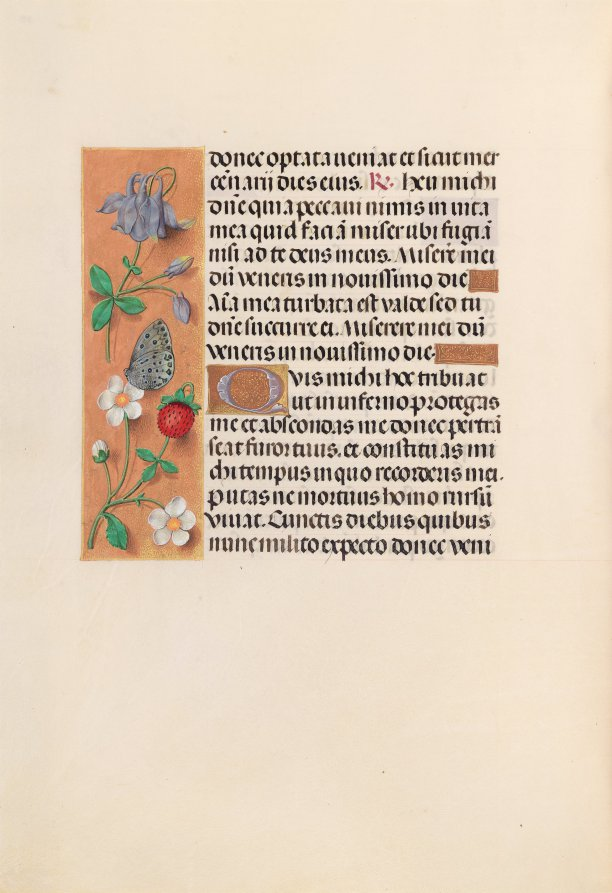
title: Hours of Queen Isabella the Catholic, Queen of Spain: Fol. 238v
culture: Flanders, Ghent and Bruges, late 15th century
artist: Master of the First Prayerbook of Maximillian (Flemish, c. 1444–1519)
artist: and Associates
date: c. 1500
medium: ink, tempera, and gold on vellum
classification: Bound Volume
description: This manuscript was illuminated by a circle of at least five highly organized manuscript painters active in the Flemish cities of Ghent and Bruges. The principal illuminator was Alexander Bening, who painted the majority of the book's miniatures. Manuscripts produced by this circle of artists are renowned for the decoration of their borders, which typically feature a rich variety of realistically-painted flowers, birds, and butterflies. This prayer book, called a book of hours, was intended not for a cleric, but for the private devotions of a lay person-in this case, Isabella the Catholic, Queen of Spain (1451-1504). Isabella's coat of arms embellishes the book's frontispiece. It is unlikely that the book was commissioned by the Queen herself; rather, she probably received it as a diplomatic gift from someone courting her patronage, perhaps Cardinal Francisco Jimenez de Cisneros. A Franciscan friar, Jimenez was dependent upon Isabella for his advancement, first to the post of Queen's confessor in 1492, and then to Archbishop of Toledo in 1495.